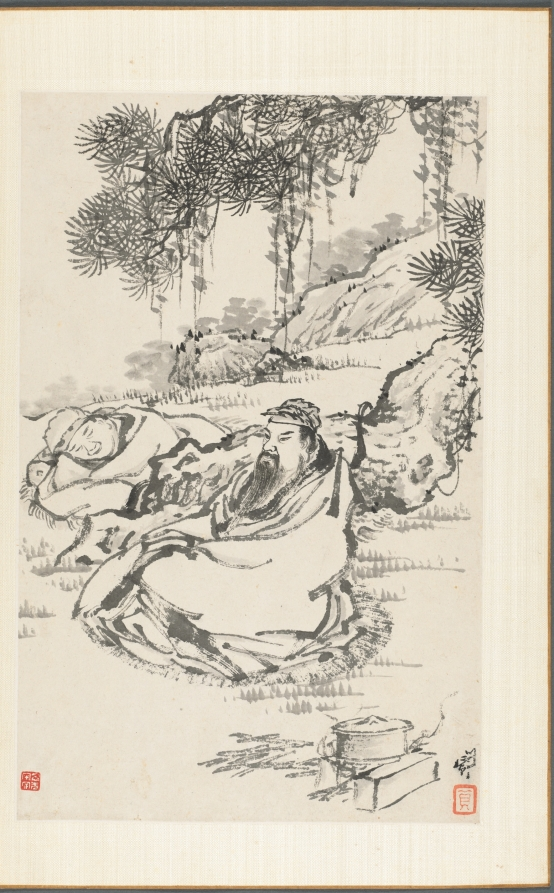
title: Lu Tong and Servant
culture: China, Qing dynasty (1644-1911)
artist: Min Zhen (Chinese, 1730–after 1788)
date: 1788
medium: album leaf, ink on paper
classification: Painting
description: Min Zhen, who was orphaned at age 12 and developed an eccentric personality, was trained by Tang Yin (1682–1756), a writer, playwright, and superintendent of the imperial porcelain workshops in Jingdezhen. The connection to him may have enabled Min to stay in Beijing for a decade from around 1773. It is not clear whether he ever resided in Yangzhou, but his style is in many instances reminiscent of that of Yangzhou artist Huang Shen. This album demonstrates Min’s versatility and mature style in the last years of his life.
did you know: Lu Tong (d. 835) was a Tang dynasty poet and tea aficionado.